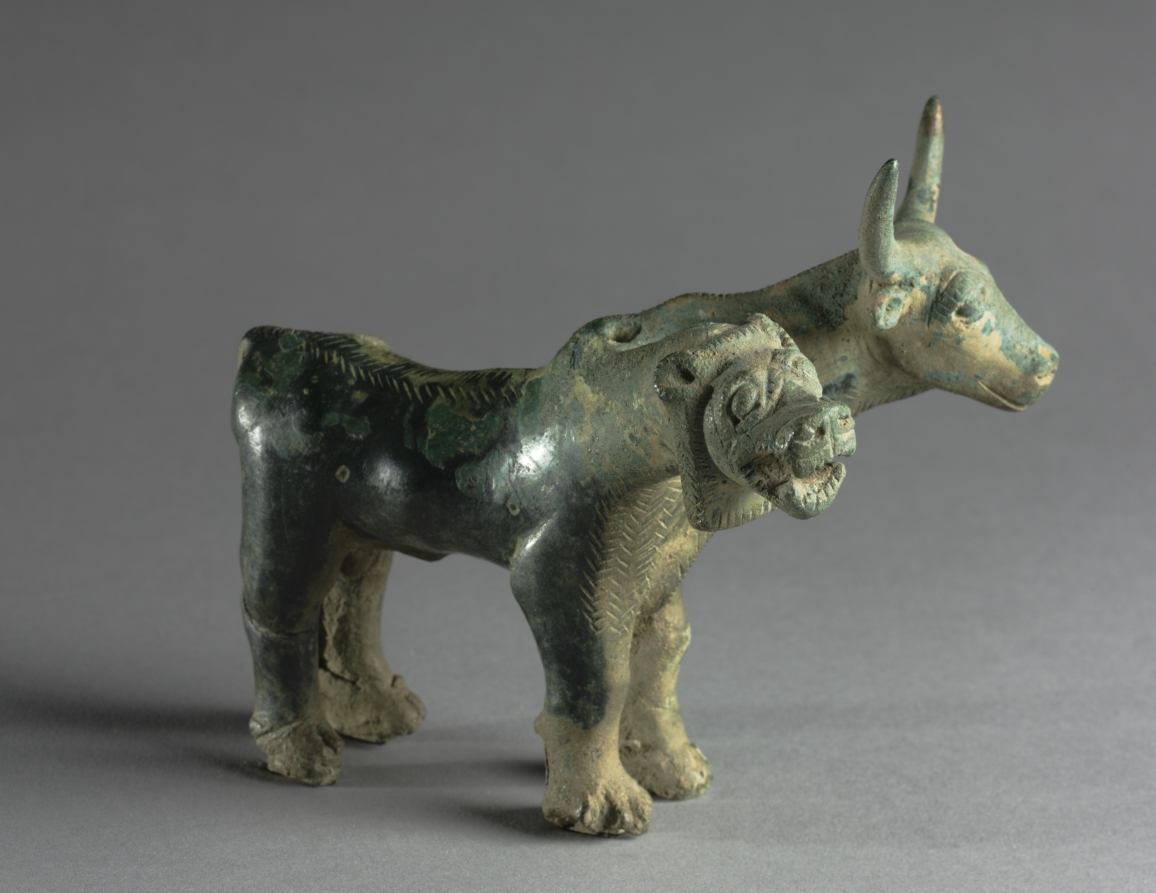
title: Composite Lion and Bull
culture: Iran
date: 1500–1000 BCE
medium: bronze, cast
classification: Sculpture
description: Combining the strength of the lion and the fertility of the bull, this creature must have served as an object of worship in a temple or shrine.